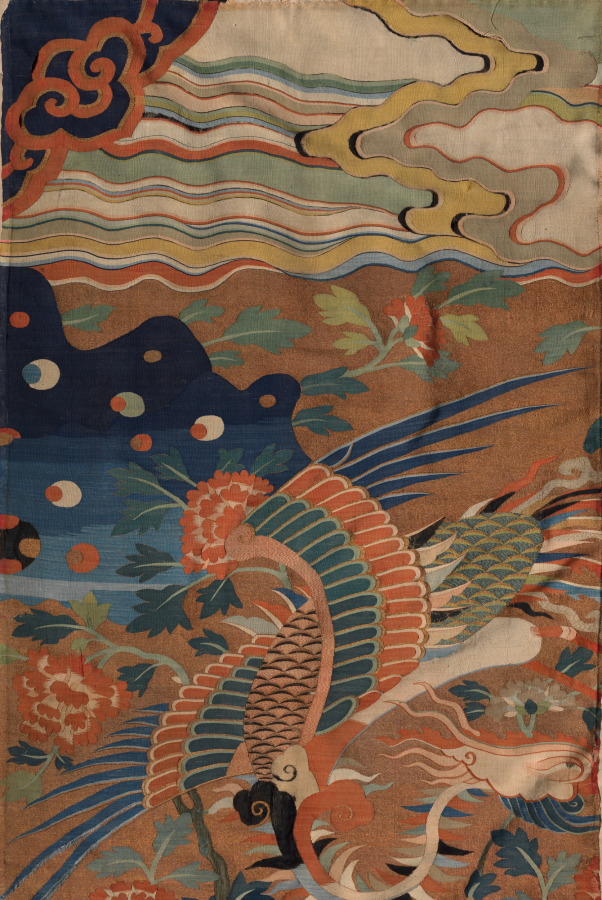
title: Tapestry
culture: China, Ming Period (1368-1644)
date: 1368–1644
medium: tapestry weave, silk and gold thread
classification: Tapestry